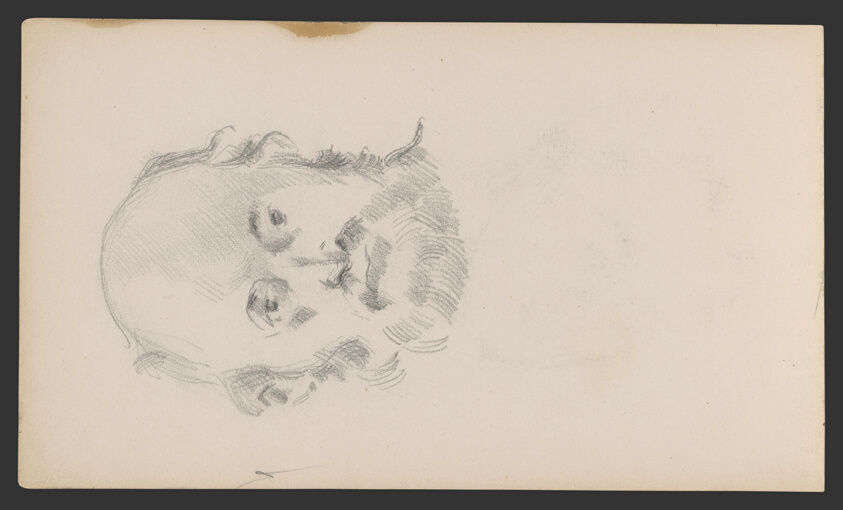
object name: Drawing and Watercolor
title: Sketchbook No. 2 (L'Estaque)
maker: Paul Cézanne; French, 1839-1906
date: 1875–86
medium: Graphite and pen and ink drawings on paper, bound into a book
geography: France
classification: sketchbook; graphite; prints and drawing; paper